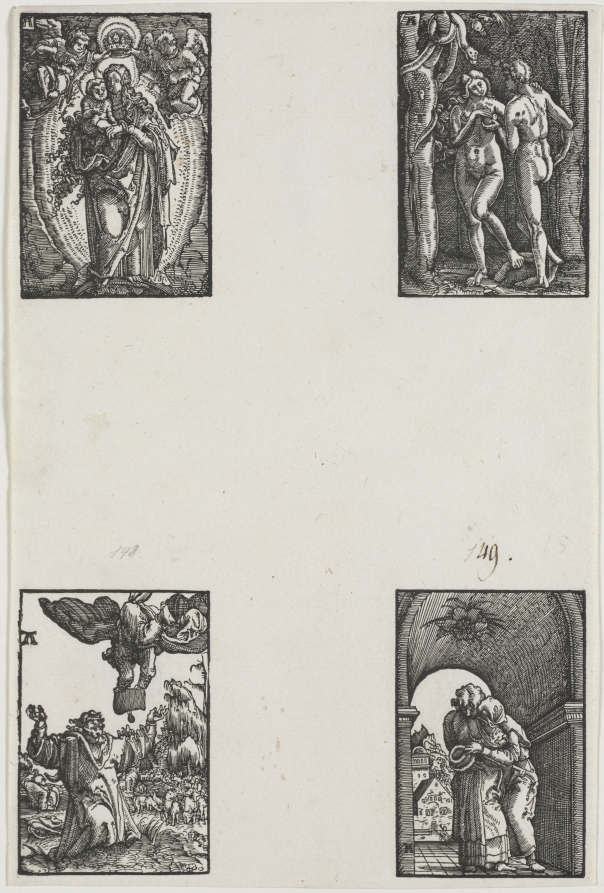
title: The Fall and Redemption of Man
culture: Germany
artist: Albrecht Altdorfer (German, c. 1480–1538)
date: c. 1513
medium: woodcut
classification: Print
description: These eight woodcuts come from a series of forty which illustrate the story of Christian redemption from original sin to the Last Judgement. Probably to maximize printing efficiency and quality, eight woodblocks were printed on each of five sheets of paper, but the subjects are not in the correct chronological order. Prior to sale, the sheets were cut into eight pieces. The sheets in the museum's set were only cut in half, preserving four prints per page. The numbers after the titles of the individual images indicate each scene's place within the narrative. By 1513, Altdorfer had already executed a number of small, finely detailed engravings. Because it is difficult to achieve the same degree of precision using woodcut, The Fall and Redemption of Man is a technical tour de force. Probably inspired by Albrecht Dürer's Small Passion (1511)-but almost double the size-the only contemporaneous comparable set of fine miniature woodcuts, Dance of Death, was designed by Hans Holbein in about 1526 (on view nearby).